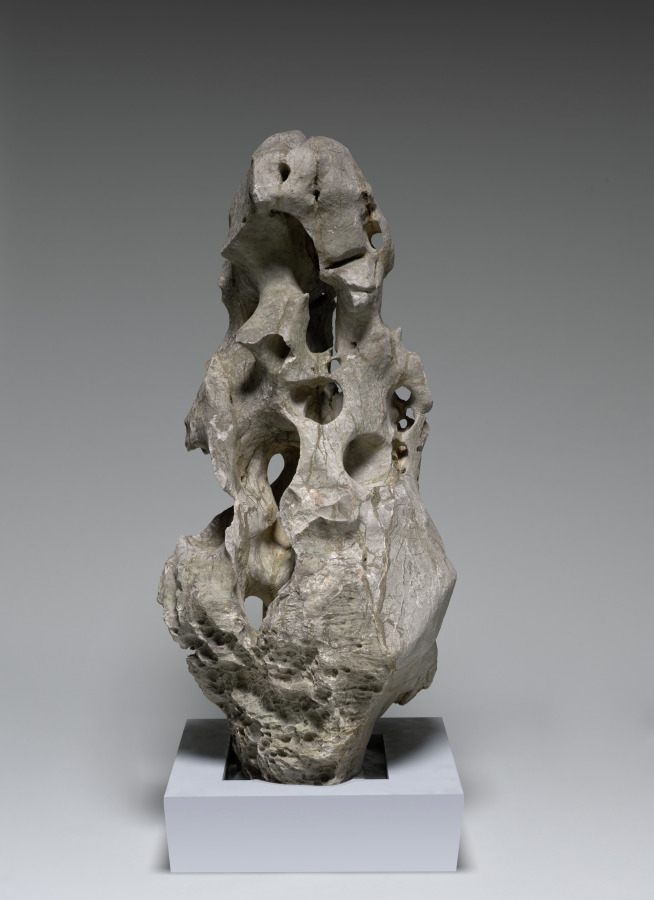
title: Taihu Garden Stone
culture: China, Jiangsu province, Wuxi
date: 0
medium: Limestone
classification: Stone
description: In China, rocks are considered elements of nature that possess spirit and life energy. With its upward winding masses, perforations, weathered surface, and multiple viewpoints, the stone exhibits sculptural qualities and embodies constant transformation through natural forces and human intervention. A solid piece of rock, it was originally sourced from the Lake Tai region. Stones were collected, set up in gardens, or installed on scholar’s desks as miniature mountains. Traditionally, Taihu stones were the most desirable type of rock. This stone is a gift by the contemporary artist Liu Dan, known for his depictions of rocks, who calls them "the stem cells of Chinese landscape."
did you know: The donor, Liu Dan, is the most prominent and celebrated painter of rocks in contemporary China.